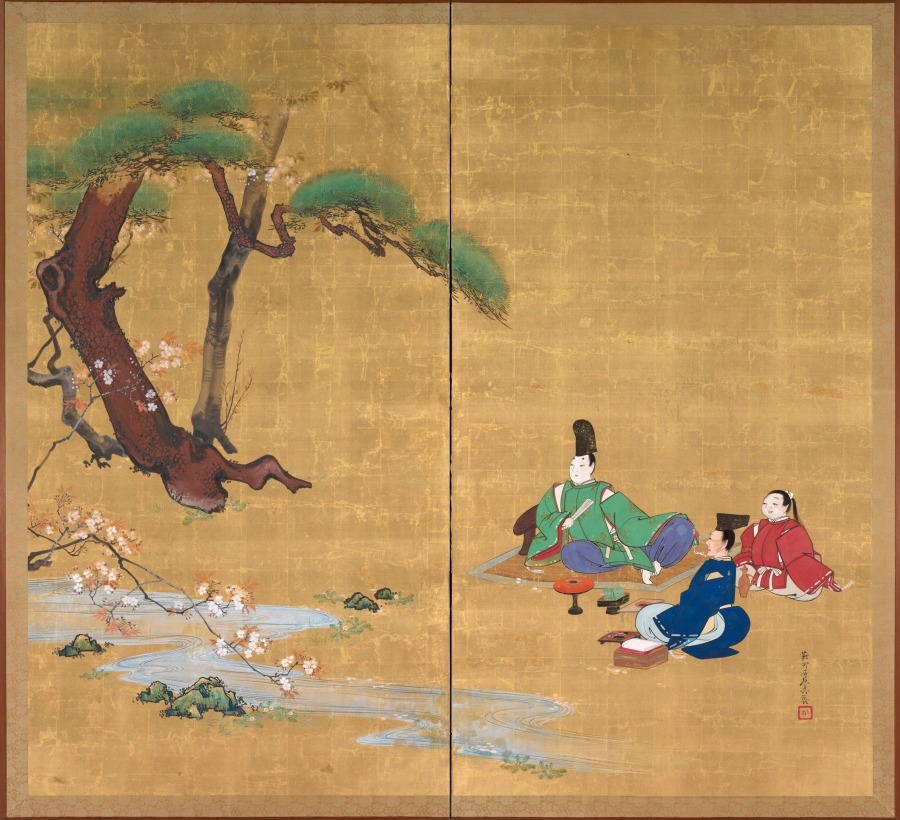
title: Nagisa Palace from the Tales of Ise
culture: Japan, Edo period (1615–1868)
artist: Shibata Zeshin (Japanese, 1807–1891)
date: late 1800s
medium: Two-panel folding screen; ink, color, lacquer, and gold on silk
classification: Painting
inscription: signed: Tairyuko Zeshin sei; sealed: Furumitsu.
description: This screen depicts an episode from the Tales of Ise, a 10th-century collection of poems and associated narratives in which the main character composes the following poem while drinking sake and viewing cherry blossoms: If, in this world of ours / All the cherry blossoms / Disappeared / The heart of spring / Might find peace. Our hero relaxes on a shoulder rest, gazing at the flowers, his sake dish before him on a lacquered stand. A plump boy attendant monitors the sake dishes, a ewer at the ready. An associate sits with paper, ink, and brush, poised to record poems.